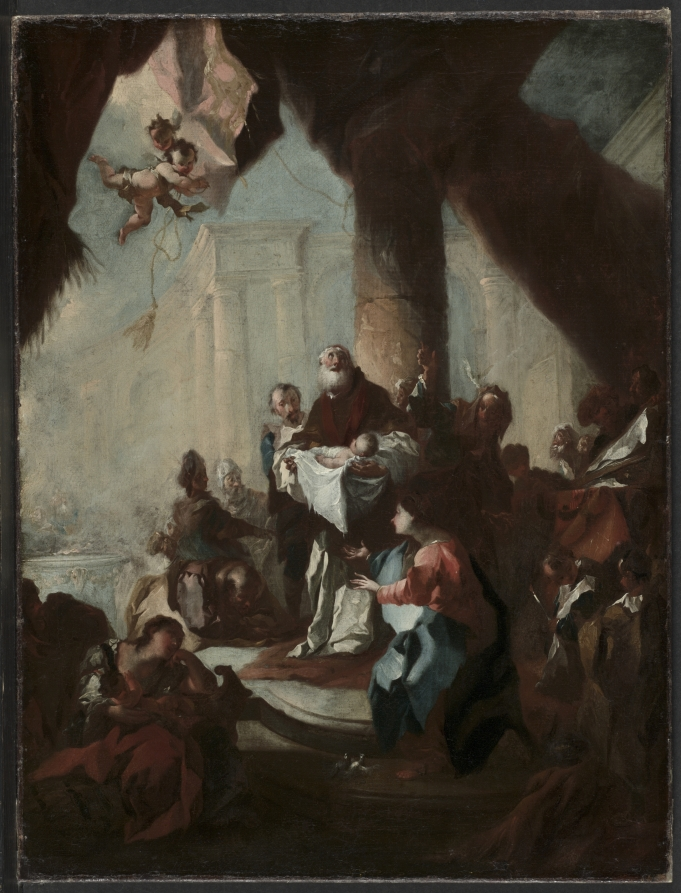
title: Study for "The Presentation of Christ in the Temple" (for Saint Ulrich, Vienna)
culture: Austria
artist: attributed to Franz Anton Maulbertsch (Austrian, 1724–1796)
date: c. 1750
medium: oil on canvas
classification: Painting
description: This loosely painted sketch is the preliminary design for an altarpiece in the Church of Saint Ulrich, Vienna. Mary and Joseph have brought the infant Jesus to the temple to be inducted into the Jewish faith; the aged priest Simeon cradles the infant in his arms, turning his gaze to heaven as he realizes that he is holding the Son of God. Strong contrasts of light and shadow underscore the drama of the moment. The frame is not original to this painting, but was made by an Austrian craftsman in the mid-1700s. Its florid style suits Maulbertsch’s flickering brushwork, and reflects the tradition of wood sculpture from Central Europe seen in other objects in the CMA's collection.